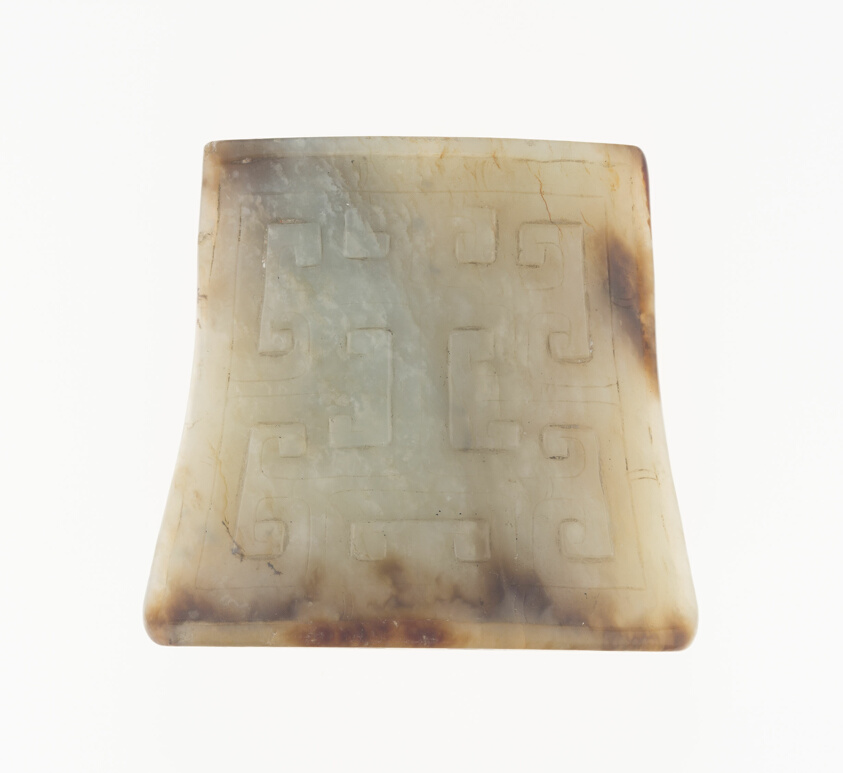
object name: Arms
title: Scabbard Chape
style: Chinese (culture or style)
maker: China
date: Western Han dynasty (206 B.C.–A.D. 9)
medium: Jade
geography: China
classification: jade; asian art; arms